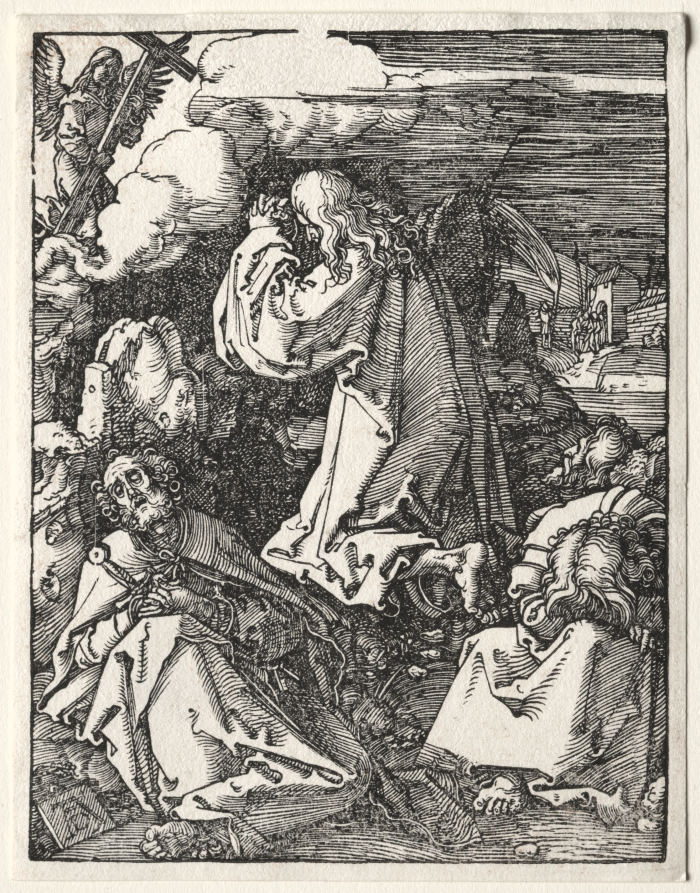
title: The Small Passion: Christ on the Mount of Olives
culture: Germany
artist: Albrecht Dürer (German, 1471–1528)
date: 1509–1511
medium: woodcut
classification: Print